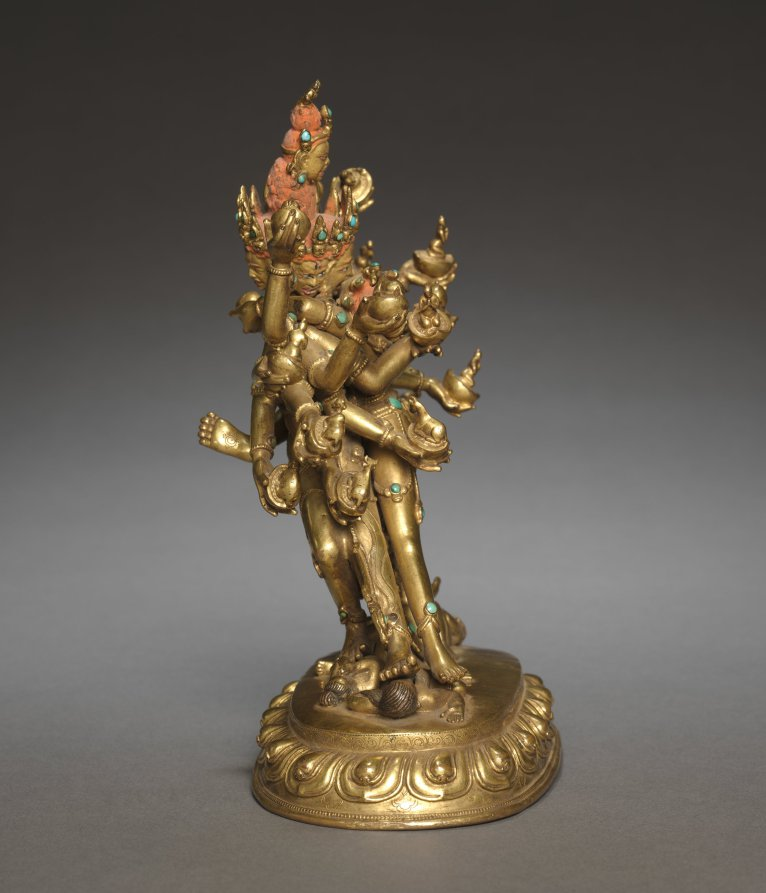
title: Hevajra and Consort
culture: Tibet, 17th century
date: 1600s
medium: gilt bronze inlaid with semiprecious stones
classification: Sculpture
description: The use of this piece in a ritual context would have indicated that practitioners were following the methods for reaching enlightenment set forth in the Hevajra Tantra text. Nairatmya, the female consort of Hevajra, appeared to the yogi Virupa (at left) in a vision and revealed to him the contents of the text, which was then passed down through a lineage of disciples. An emanation of Akshobhya, the Cosmic Buddha of the East, Hevajra holds a skull bowl in his 16 hands. The rear pair of Hevajra's four legs is shown in a dynamic dance posture, while his front two legs are in a lunge, trampling the miserable personifications of ignorance and the false sense of ego. Also trampling them is the left foot of his consort Nairatmya, who has her other leg wrapped around his waist. The figures are explicitly shown in sexual union, indicative of the bliss that comes from conquering all impediments to enlightenment.